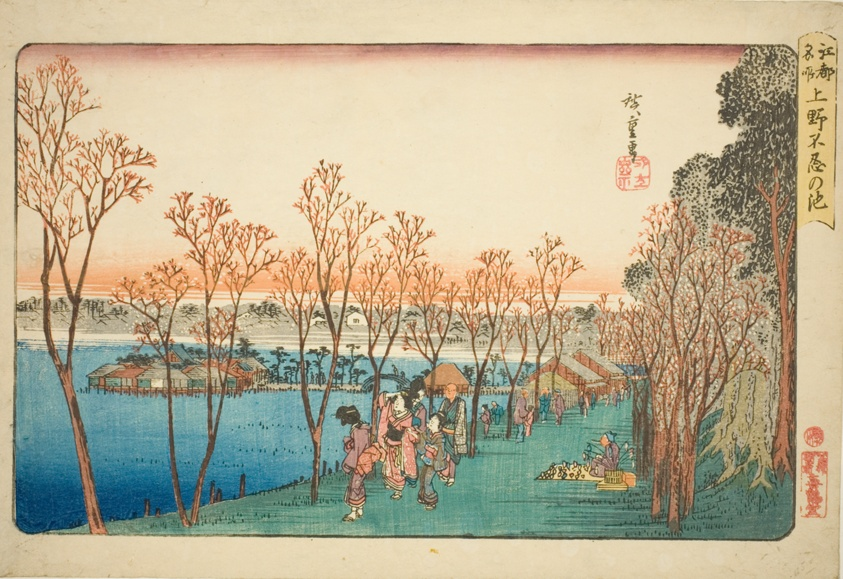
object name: Print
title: Shinobazu Pond at Ueno (Ueno Shinobazu no ike), from the series "Famous Places in Edo (Koto meisho)"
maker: Utagawa Hiroshige 歌川 広重; Japanese, 1797-1858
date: c. 1832/34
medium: Color woodblock print; oban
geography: Japan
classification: woodblock print; print; asian art